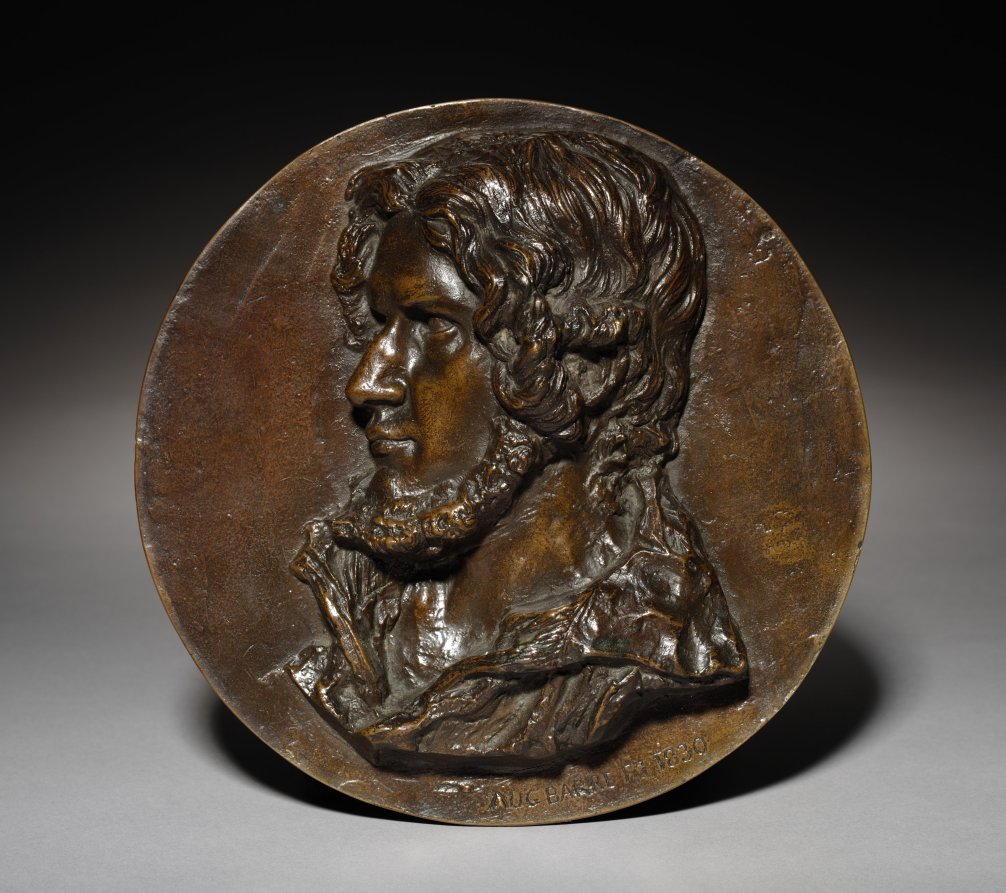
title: Portrait Medallion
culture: France, 19th century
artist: Jean-Auguste Barre (French, 1811–1896)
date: 1830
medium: bronze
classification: Sculpture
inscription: inscribed directly below portrait: AUG BARRE F.T 1830.